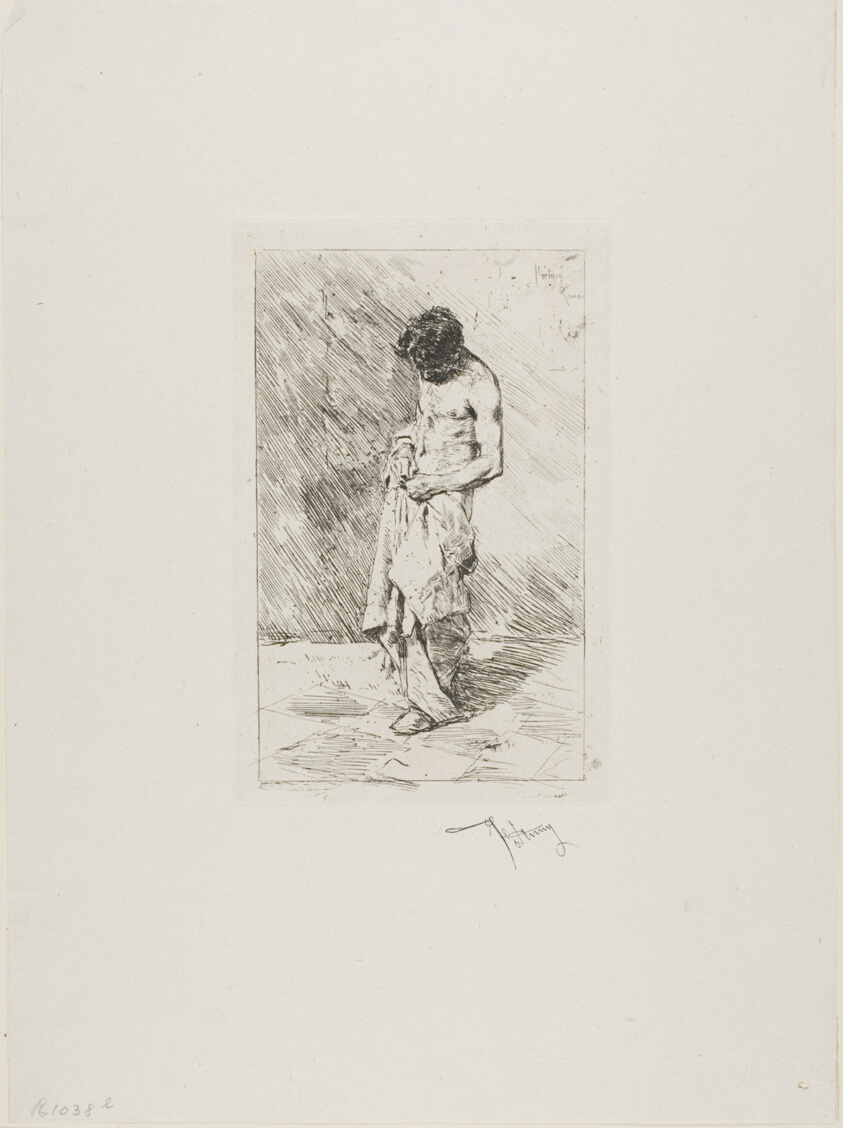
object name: Print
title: The Filthy Man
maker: Mariano José María Bernardo Fortuny y Carbó; Spanish, 1838-1874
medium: Etching on paper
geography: Spain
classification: etching; print; prints and drawing